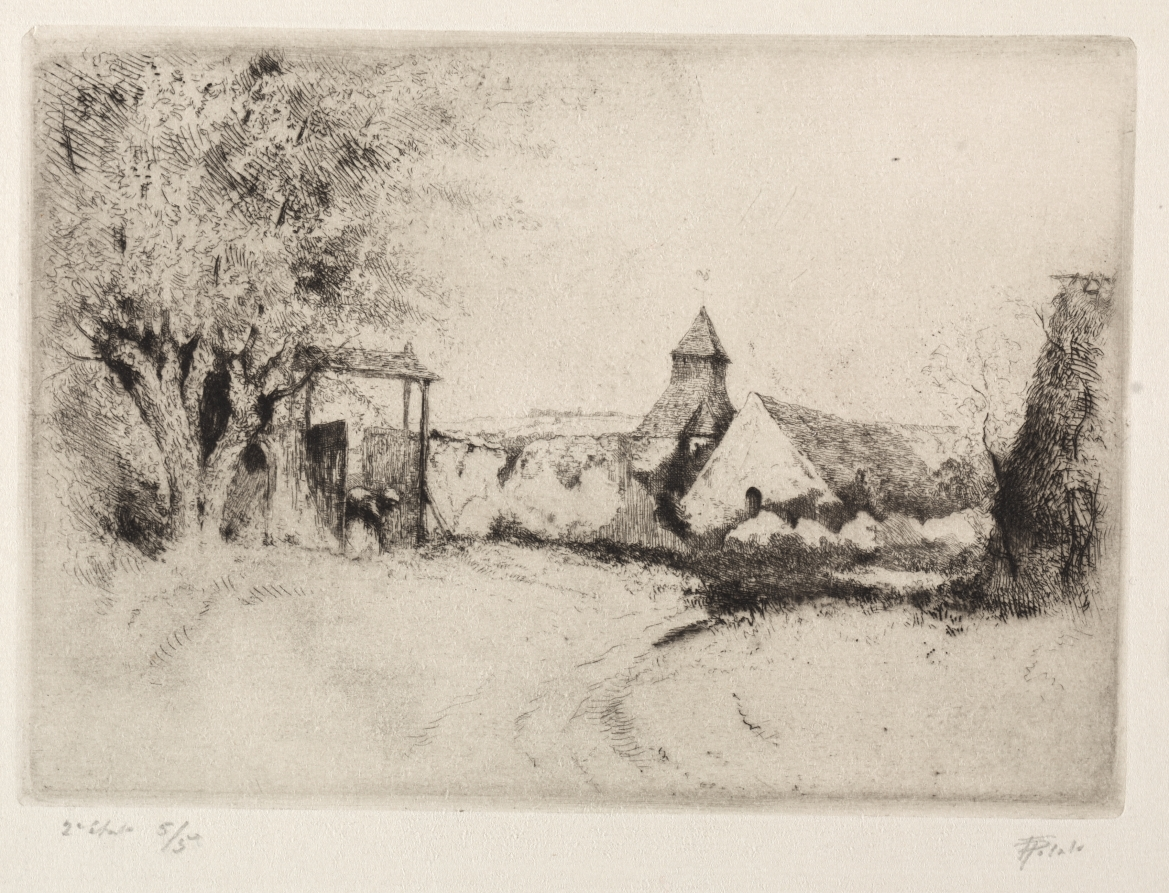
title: The Belfry by the Willows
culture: France, 20th century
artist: Tigrane Polat (French, 1874-)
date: 1900?–1925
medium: etching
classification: Print